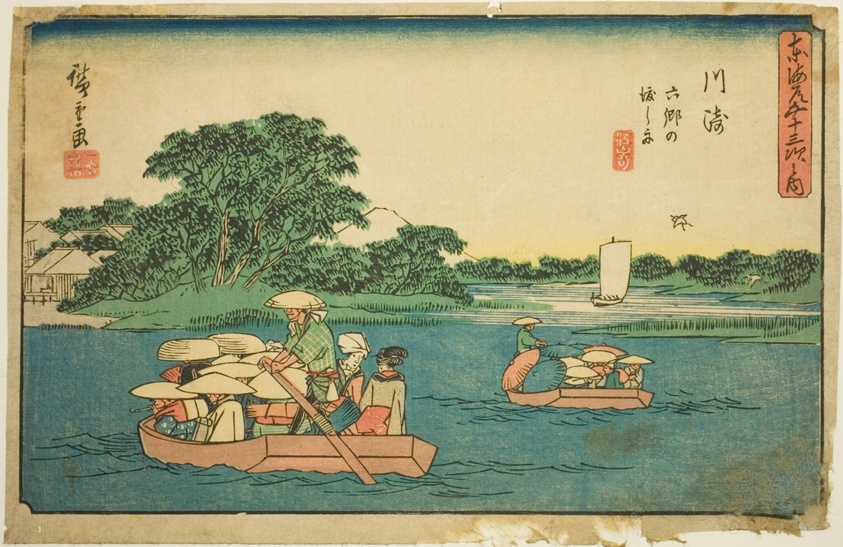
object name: Print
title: Kawasaki: Ferry Boats at Rokugo (Kawasaki, Rokugo no watashibune), from the series "Fifty-three Stations of the Tokaido (Tokaido gojusan tsugi no uchi)," also known as the Gyosho Tokaido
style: Japanese (culture or style)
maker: Utagawa Hiroshige 歌川 広重; Japanese, 1797-1858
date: c. 1841/44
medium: Color woodblock print; aiban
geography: Japan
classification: woodblock print; print; asian art